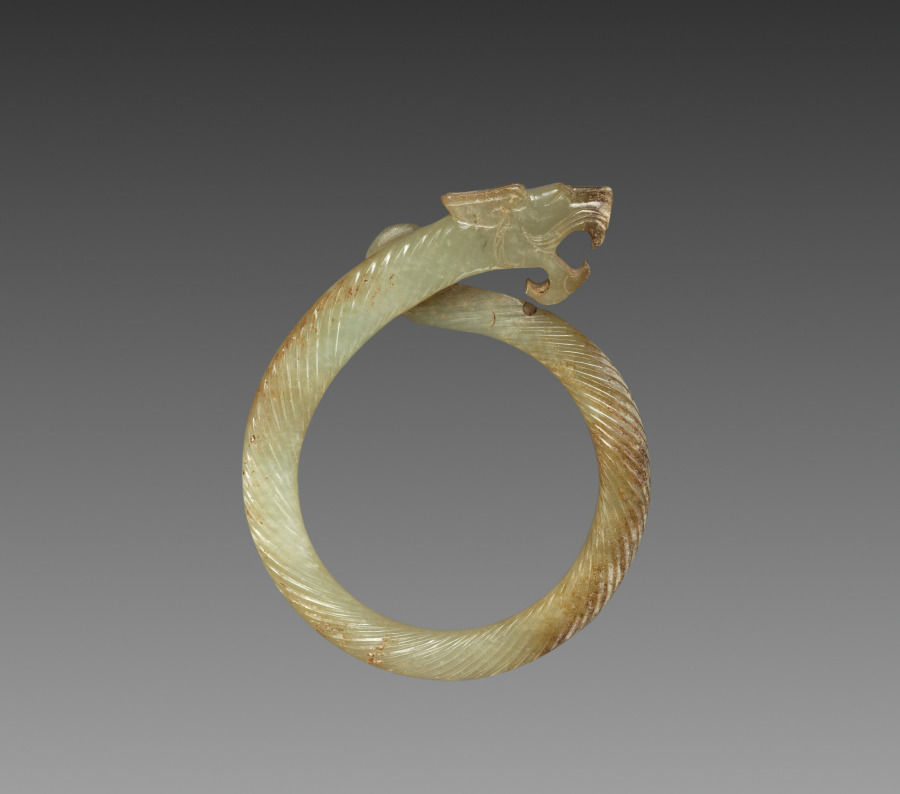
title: Fluted Ring with Dragon Head (Huan)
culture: China, Warring States period (475–221 BCE)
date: 475–221 BCE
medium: jade (nephrite)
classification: Jade